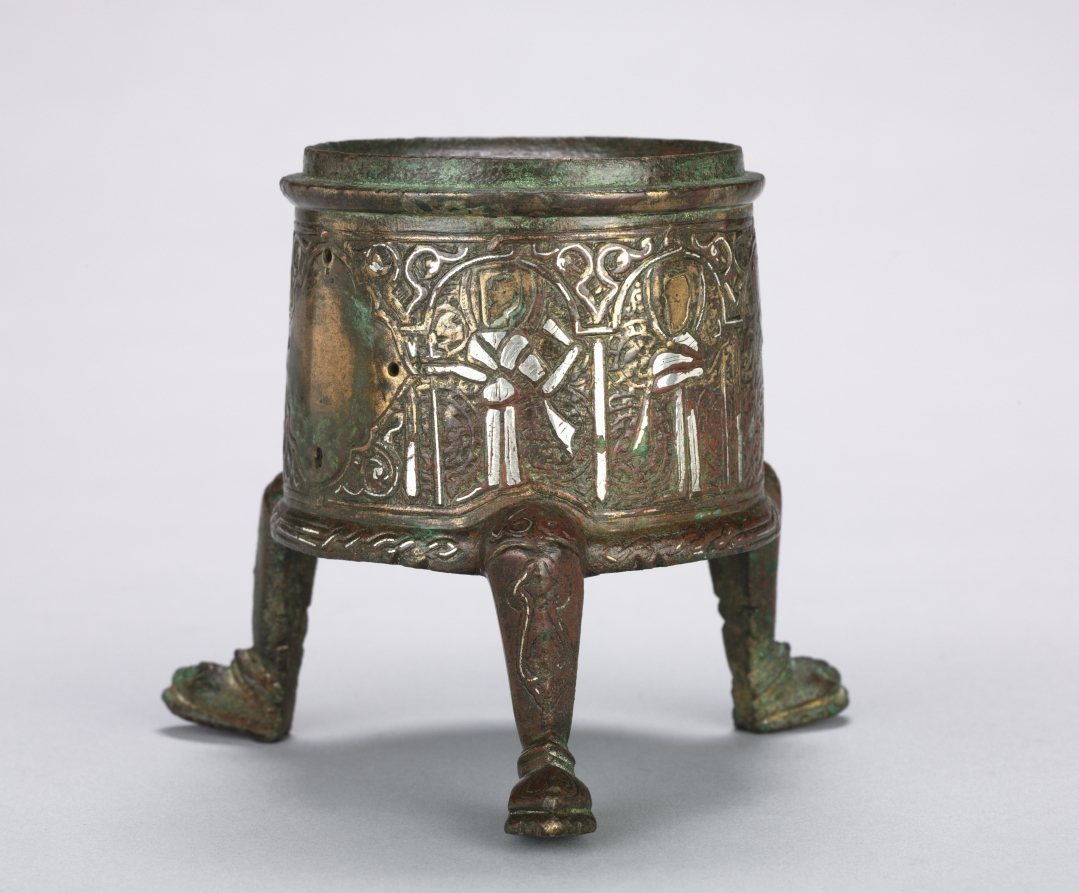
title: Incense Burner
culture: Syria, Ayyubid Period, 13th Century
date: 1200–1250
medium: brass inlaid with silver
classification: Metalwork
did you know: This footed vessel is wearing shoes.